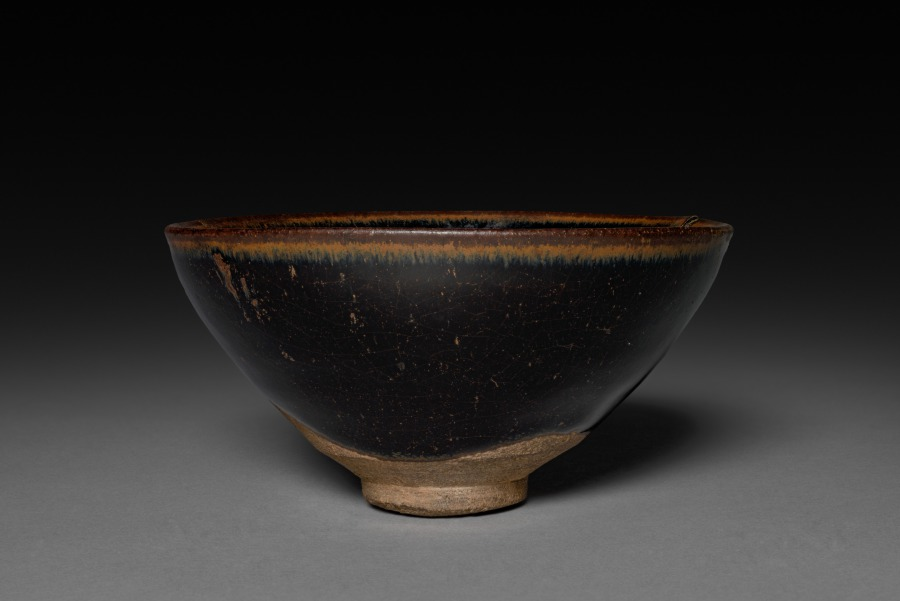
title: Tea Bowl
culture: China, near Shui ch'i, Song dynasty (960-1279)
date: 960–1279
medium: Stoneware, Jian ware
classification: Ceramic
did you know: Jian ware was very popular with the tea cultures in China and Japan.